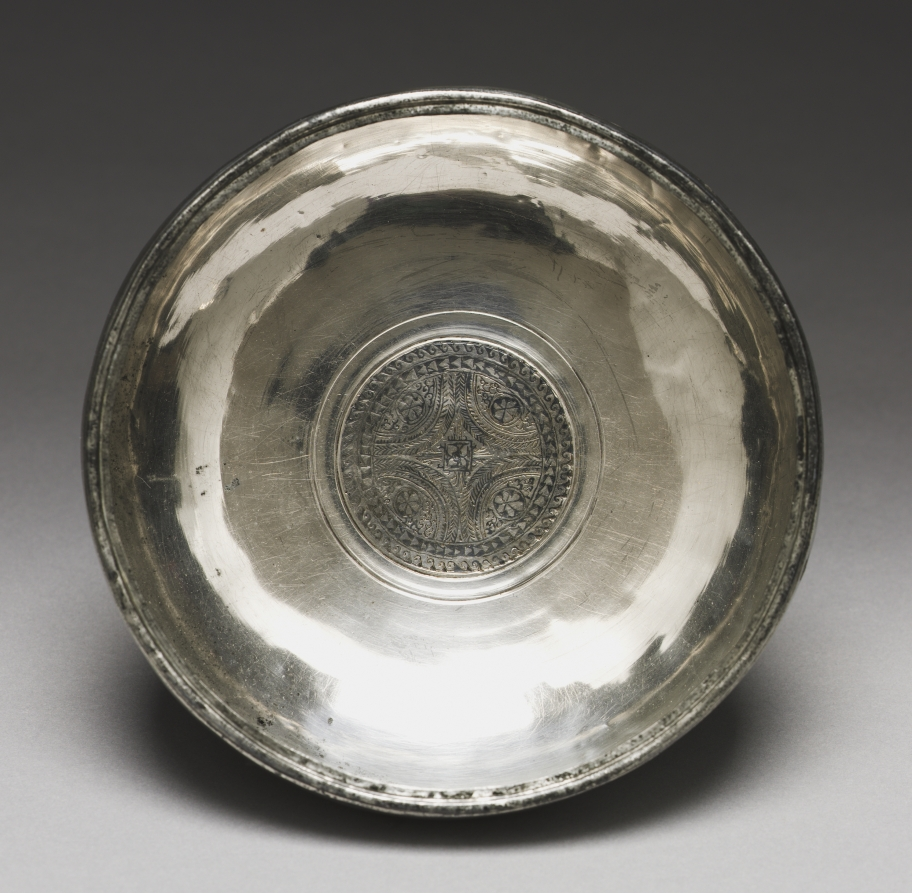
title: Bowl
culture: Byzantium, Syria(?), Byzantine period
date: 350–450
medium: silver with niello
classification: Metalwork